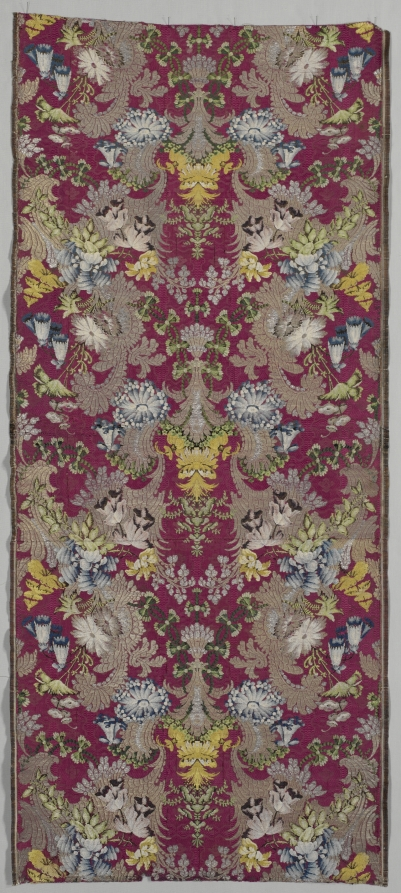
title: Length of Silk Brocade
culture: France, first half of 18th century (late Baroque)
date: 1700–1750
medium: warp-patterned weave, brocaded; silk, silver, and gold thread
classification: Textile